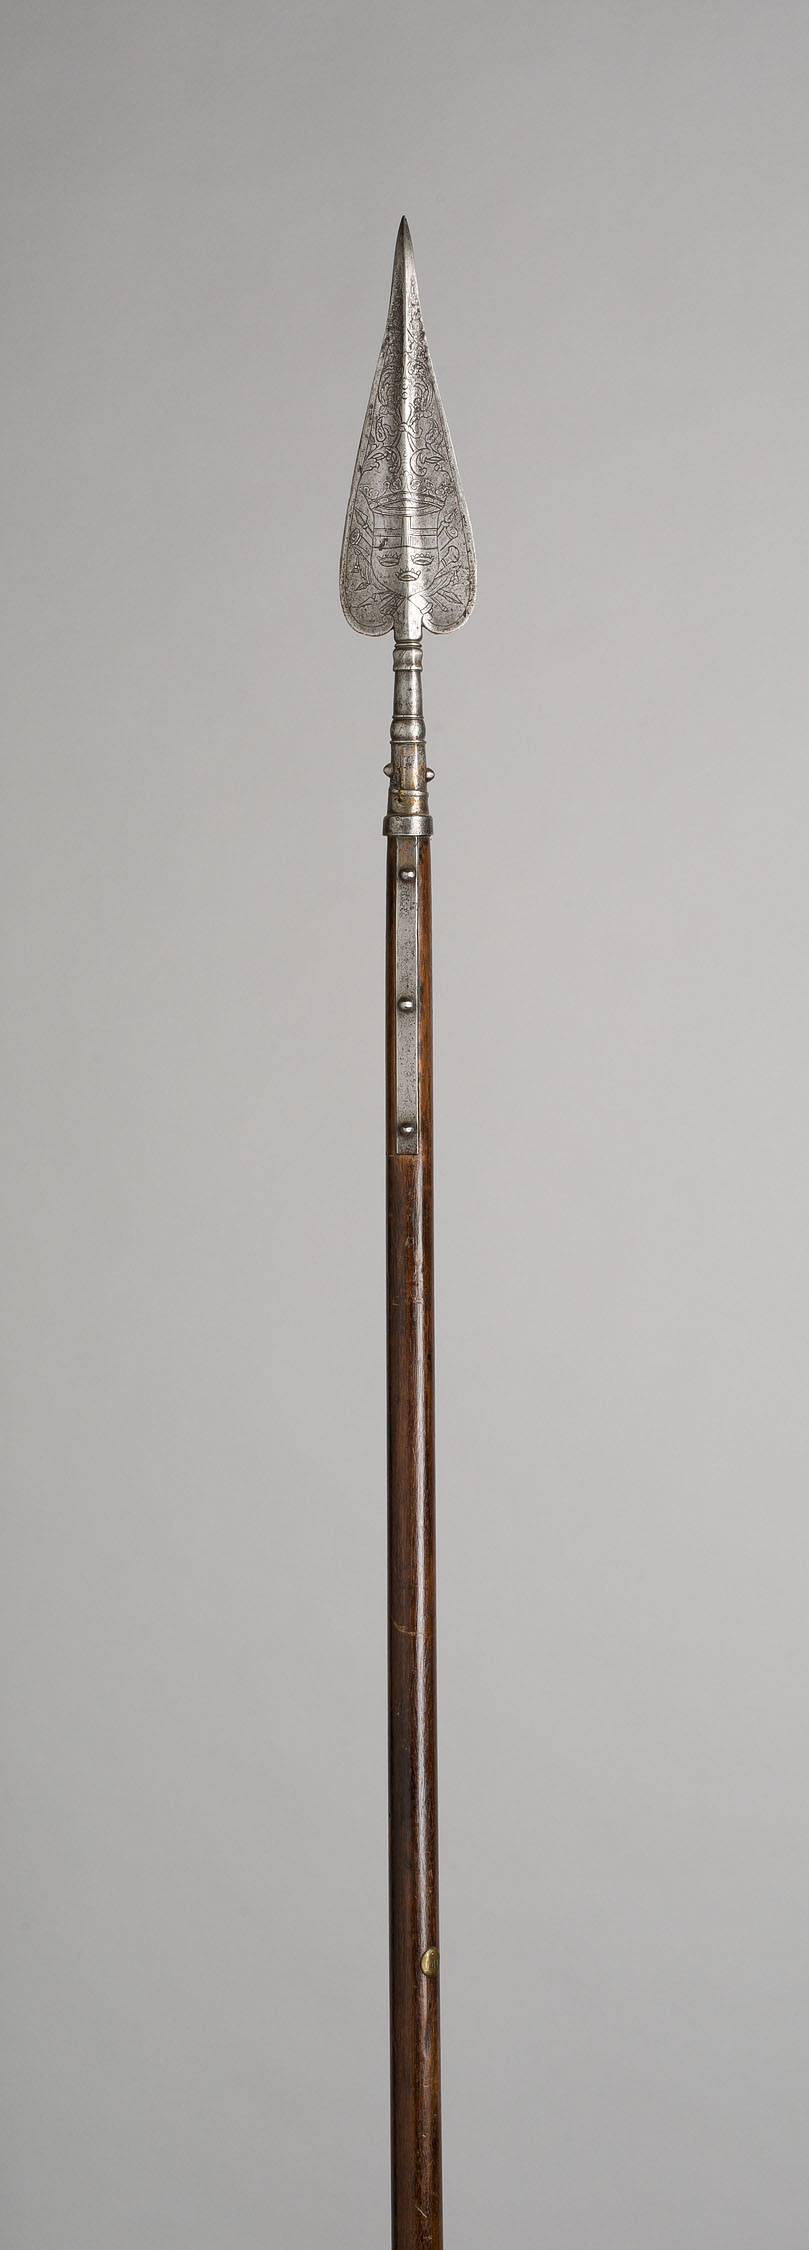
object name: Arms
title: Officer's Half-Pike (Spontoon)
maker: Swedish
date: 1670/1700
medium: Steel and wood (oak)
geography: Sweden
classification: edged weapon-staff; arms; arms and armor